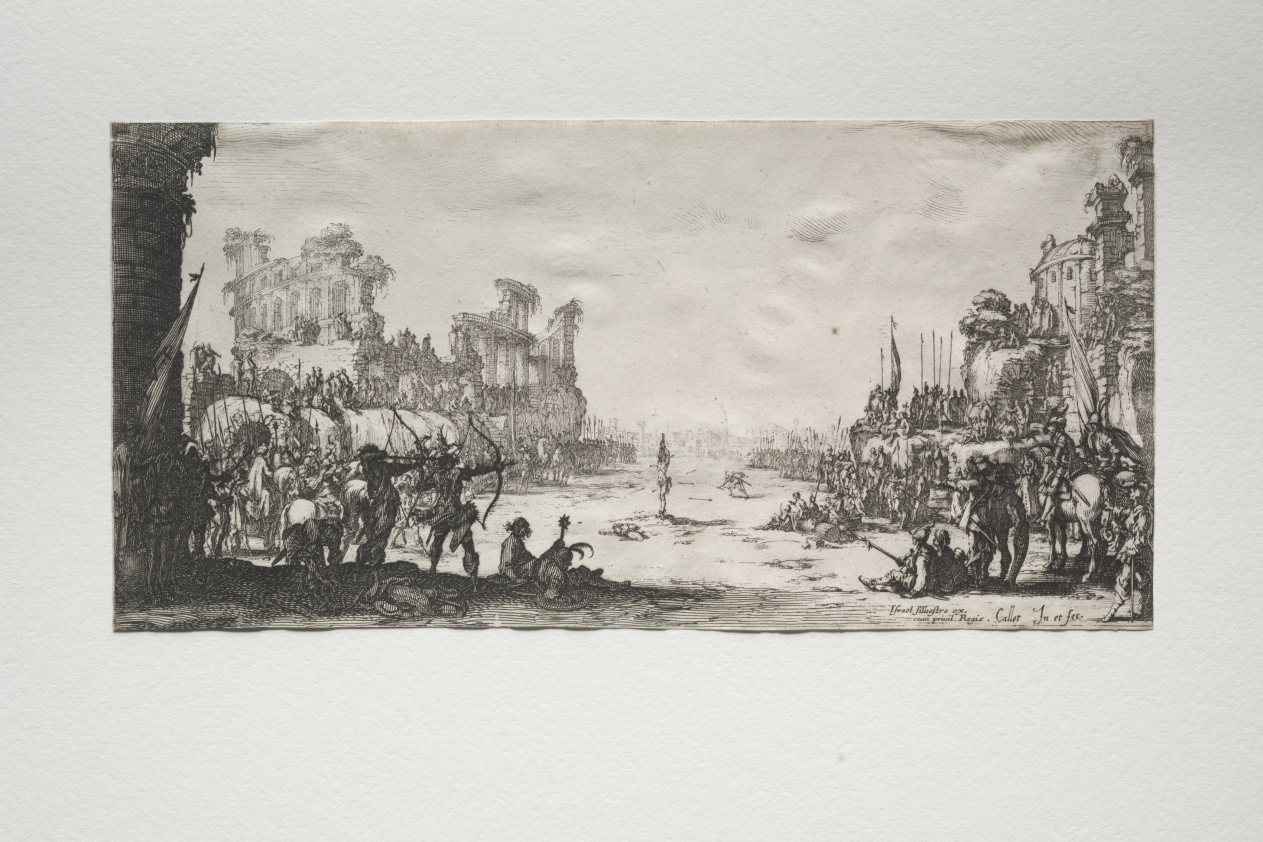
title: The Martyrdom of St. Sebastian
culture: France, 17th century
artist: Jacques Callot (French, 1592–1635)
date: ca. 1631–33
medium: etching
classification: Print